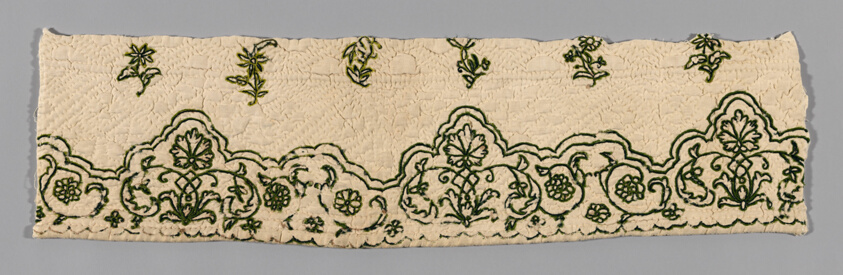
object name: Textile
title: Fragments from a Bedcover made of Petticoat Borders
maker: France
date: Late 18th century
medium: Cotton, plain weave; embroidered with wool threads in chain stitch; quilted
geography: France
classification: textile; needlework (visual works); weaving